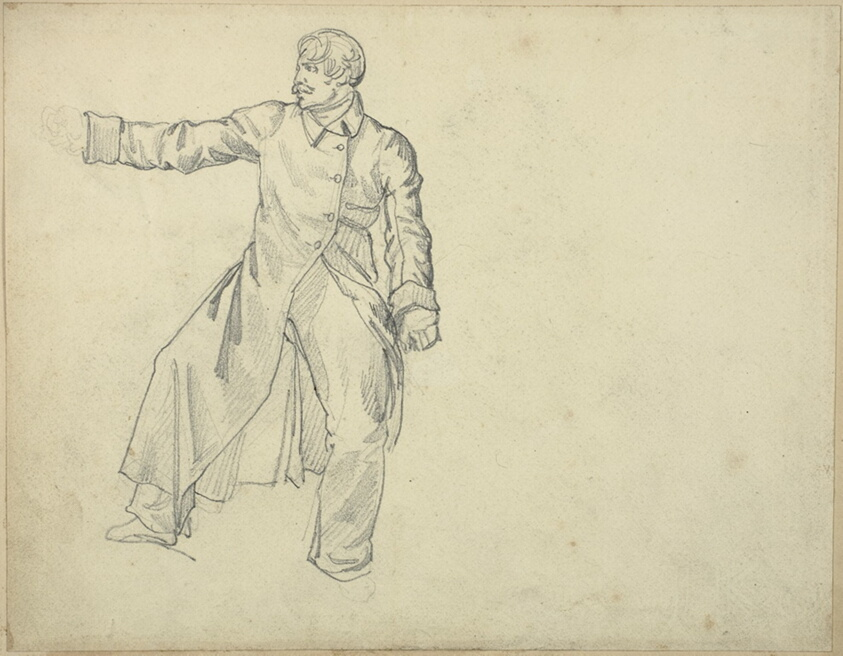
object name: Drawing and Watercolor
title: Study of an Artilleryman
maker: Jean Louis André Théodore Géricault (French, 1791-1824)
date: c. 1818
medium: Graphite on cream wove paper, perimeter mounted on cream wove paper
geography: France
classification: drawings (visual works); prints and drawing